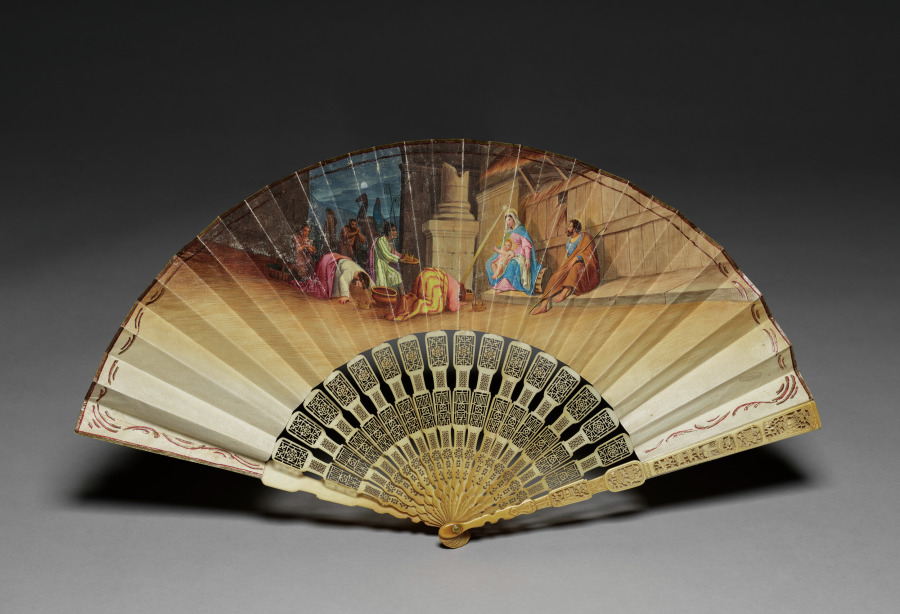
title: Fan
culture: Europe, first half 19th century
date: 1800–1850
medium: ivory, painted paper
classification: Miscellaneous